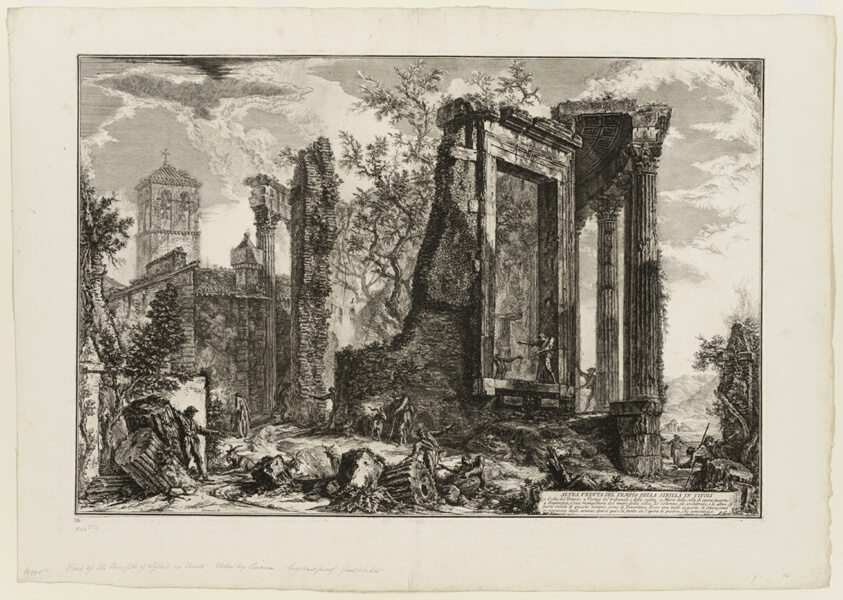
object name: Print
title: Another view of the Temple of the Sibyl at Tivoli, from Views of Rome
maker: Giovanni Battista Piranesi (Italian, 1720-1778); published by Francesco (Italian, 1758-1810) and Pietro Piranesi (Italian, born 1758/9)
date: 1761, published 1800–07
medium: Etching on heavy ivory laid paper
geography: Italy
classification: etching; print; prints and drawing